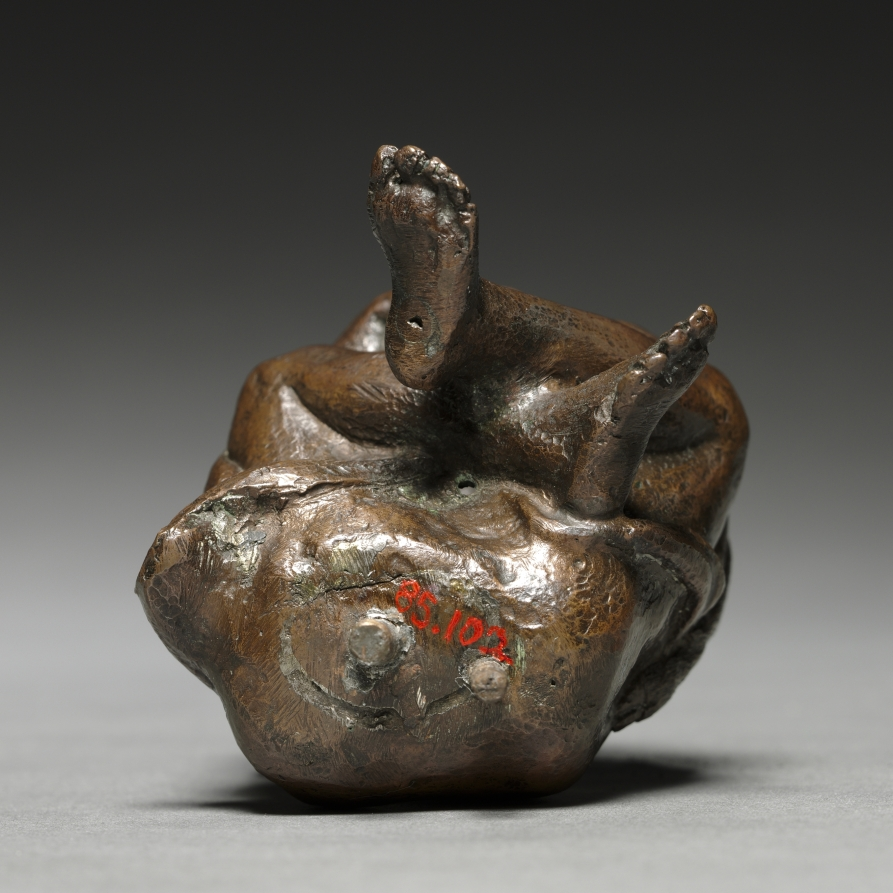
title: Seated Boy Clothed with Goat Skins Holding an Open Barrel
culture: Italy, Padua, 16th century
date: c. 1525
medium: bronze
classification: Sculpture